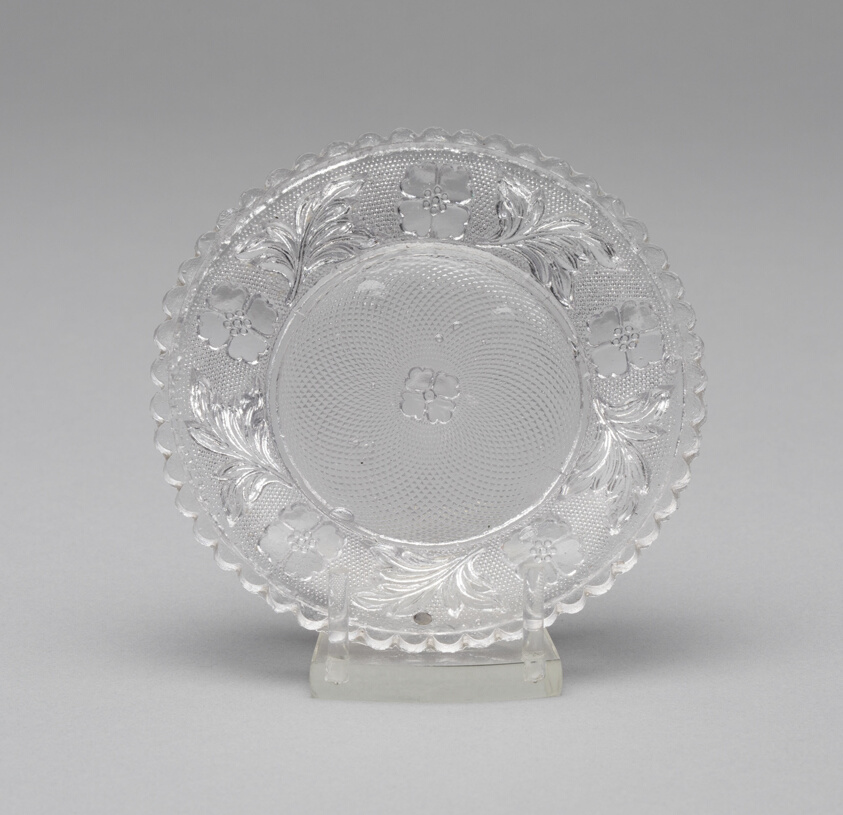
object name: Glass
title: Cup plate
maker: Artist unknown (American, 19th century); New England or Philadelphia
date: 1830–35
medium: Pressed glass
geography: New England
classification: plate (general, dish); glass; american decorative arts; american arts; decorative arts